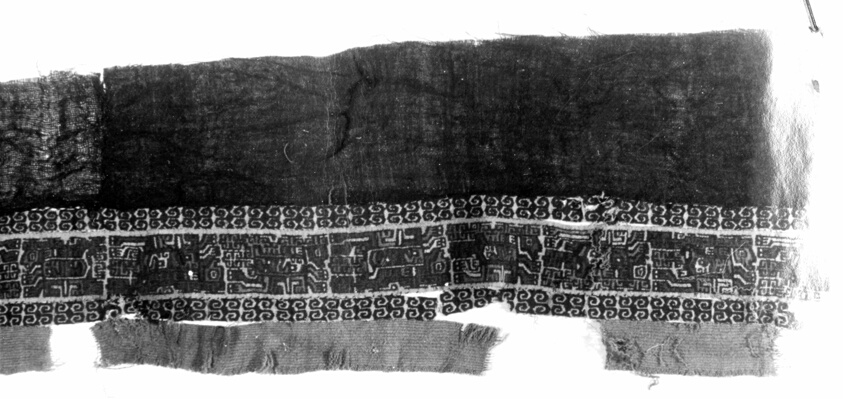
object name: Textile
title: Fragments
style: nazca, andean, andes, Pre-Columbian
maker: Nazca-Wari; Peru, Probably south coast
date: A.D. 700/900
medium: Slit tapestry and plain cloth. Applied paint gold colored border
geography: Peru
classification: textile; weaving